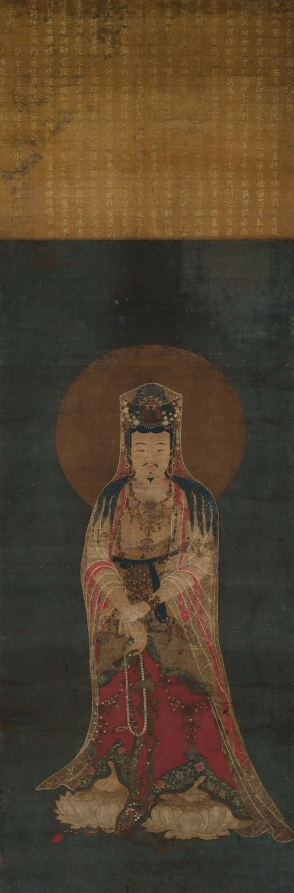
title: Kannon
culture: Japan, Meiji period (1868–1912)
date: c. 1868–1912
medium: hanging scroll; ink and color on silk; inscription in gold ink on silk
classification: Painting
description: The bodhisattva Avalokiteshvara (Kannon in Japanese) stands with each of his feet upon a lotus blossom. The Buddha Amitabha (Amida in Japanese) appears in his headdress. The text written in golden characters attached to the top of the painting is a portion of a religious text extolling the virtues of the bodhisattva. The painter was inspired by Buddhist paintings of the Korean Goreyo period (918–1392); he attempted to reproduce the diaphanous shawl sometimes seen in such early works.